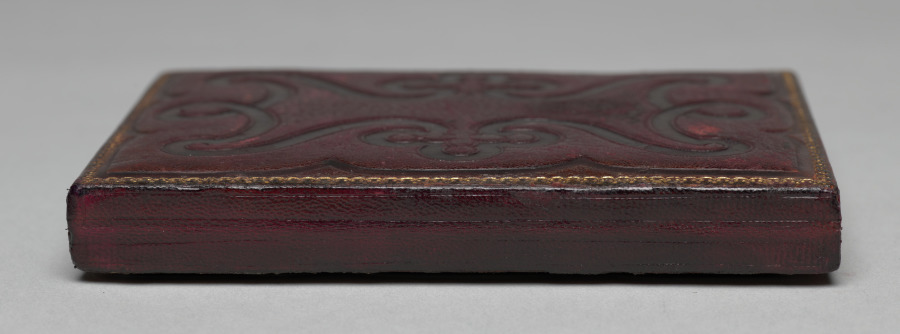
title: Secretary for a Lodge of a Temperance Organization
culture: America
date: c. 1854–55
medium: daguerreotype, half-plate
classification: Photograph